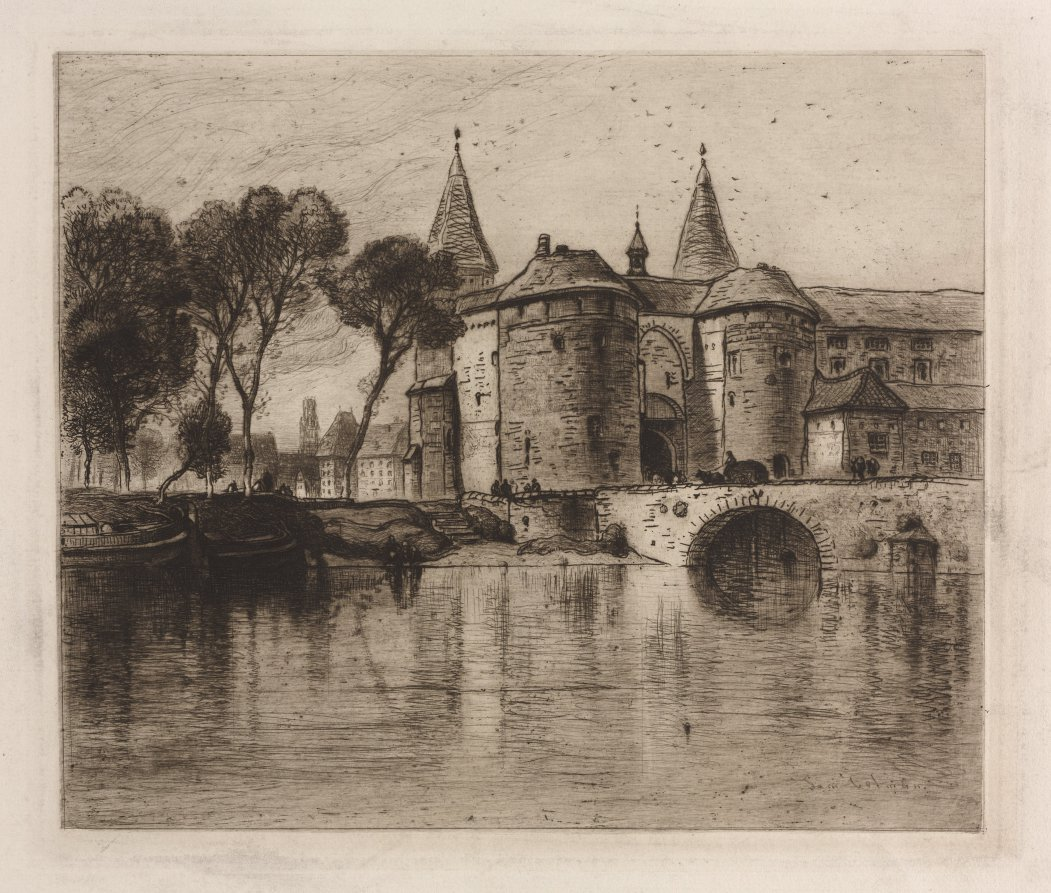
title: Pont de Grand, Bruges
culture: America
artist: Samuel Colman (American, 1832–1920)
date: 1884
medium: etching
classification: Print